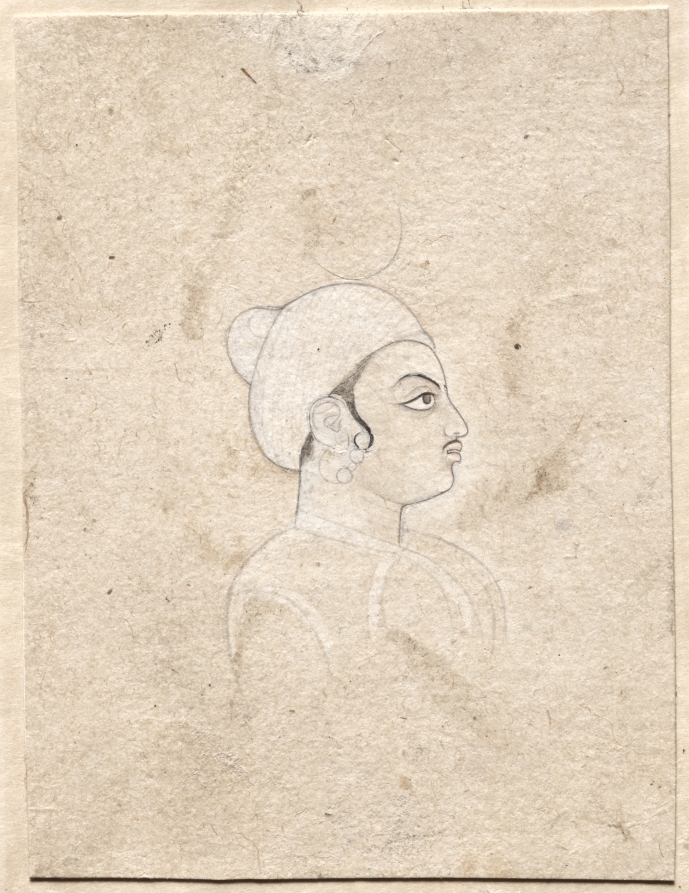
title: Portrait of a man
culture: Northern India, Pahari kingdoms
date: late 1700s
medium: Gum tempera on paper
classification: Drawing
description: Before creating final paintings, Pahari artists made drawings in order to perfect portraits or expressions. The curling side lock indicates that he is an unmarried youth with just the beginnings of a moustache. Areas of white paint around the outline of the face effectively erase prior attempts at drawing his profile. The artist used the same white paint to highlight the eyes, turban, and garment.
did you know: This drawing was once owned by William E. Ward, the CMA’s chief designer from 1957 to 1993, who taught Calligraphy and Watercolor at the Cleveland Institute of Art.